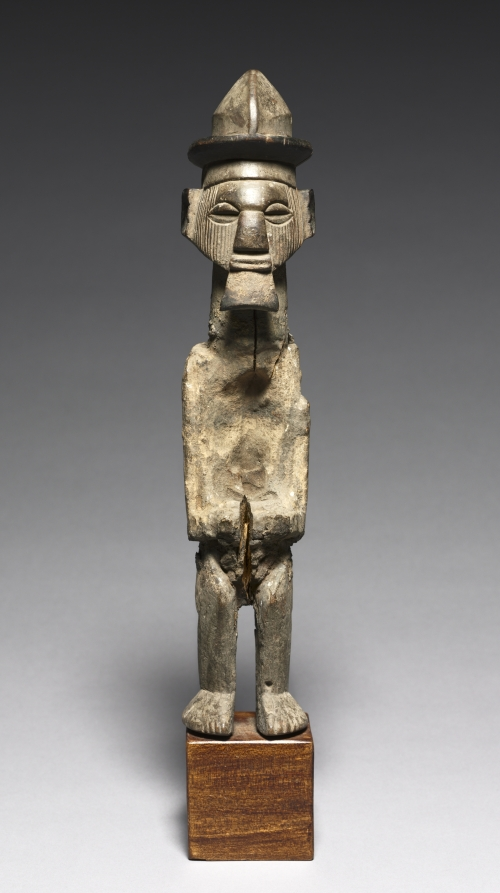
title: Male Figure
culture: Africa, Central Africa, Republic of the Congo or Democratic Republic of the Congo, Teke-style maker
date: early 1800s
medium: Wood and organic materials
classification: Sculpture